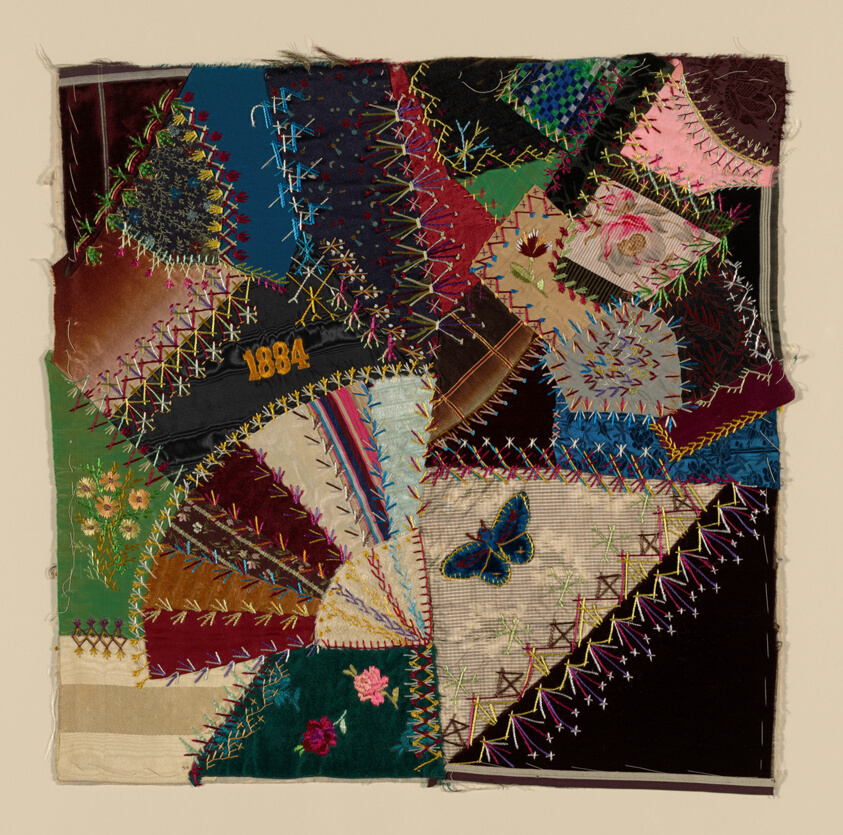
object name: Textile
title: Fragment from Bedcover (Crazy Quilt Block)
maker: United States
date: 1884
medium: Silk and silk and cotton, plain, twill and satin weaves; some with secondary binding warps; some with supplementary pile warps forming velvets; some with supplementary patterning warps and wefts; some with brocading wefts; some self-patterned; some warp dyed or painted; some 'watered'; some appliquéd; some embroidered with silk and silk chenille in cross, double feather, feather, fly, open buttonhole, satin and stem stitches; French knots; all pieced and embroidered with silk in buttonhole, cross, double feather, feather, fly, herringbone, single satin and stem stitches; French knots; cotton batting; backed with cotton, plain weave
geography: United States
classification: needlework - quilt; textile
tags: butterflies, curvilinear shapes, floral motifs, flowers, geometric motif, numbers, squares, stripes, zigzags